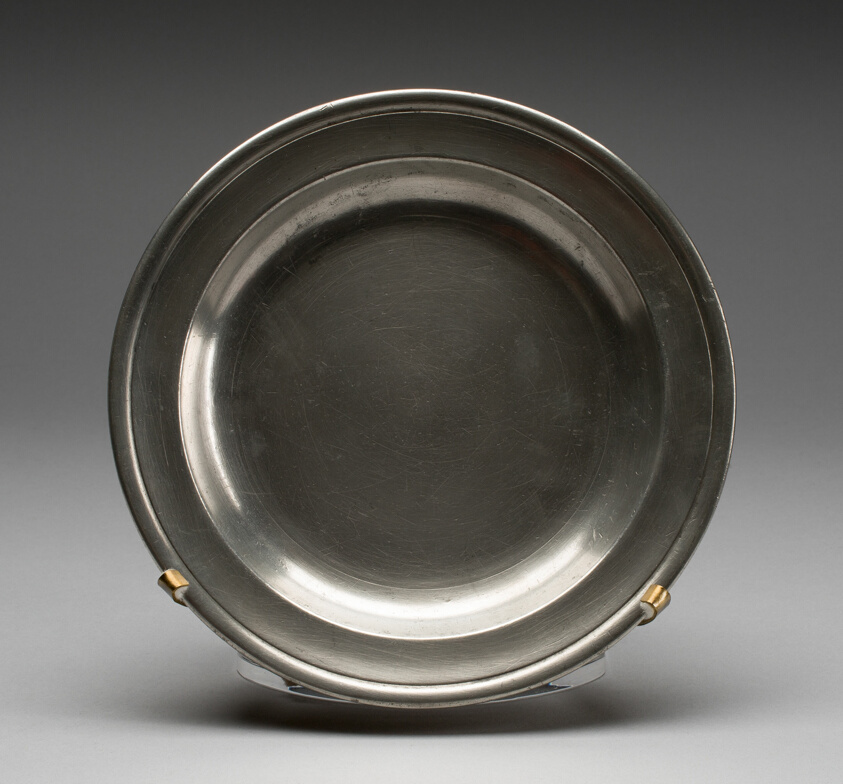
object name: Decorative Arts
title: Plate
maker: Boardman and Company; American, 1825–27; New York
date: 1825–27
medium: Pewter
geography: New York City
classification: plate (general, dish); dish (vessel); metalwork; american decorative arts; american arts; decorative arts